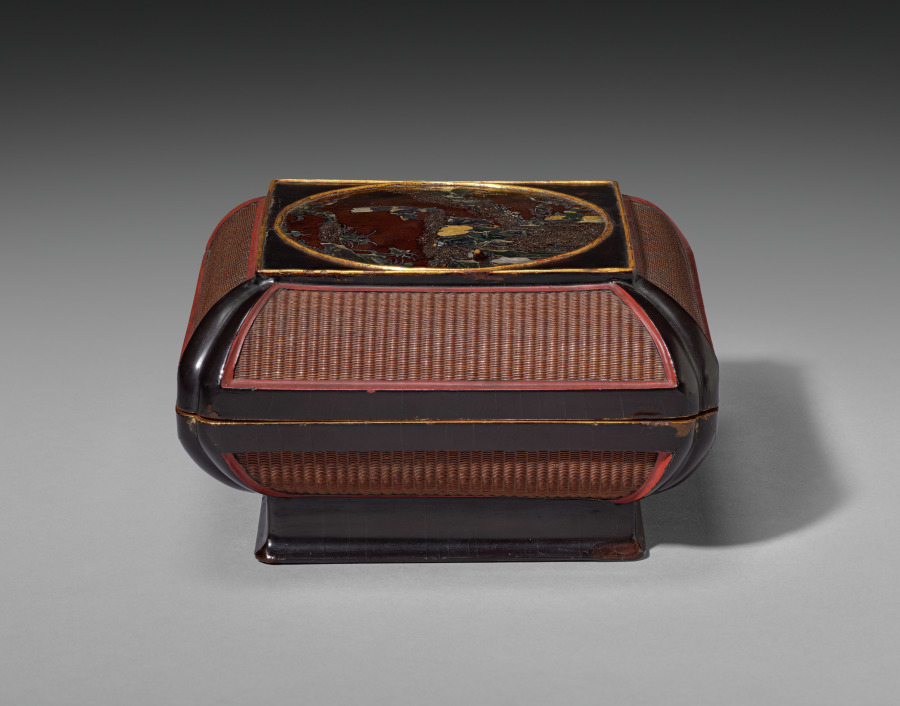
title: Wickerwork Box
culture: China, Ming dynasty (1368-1644), Wanli reign (1572-1620)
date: 1609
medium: lacquered wickerwork (of woven bamboo) framed in wood with circular scene inlaid in mother-of-pearl and gold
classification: Lacquer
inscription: Inscription at bottom in red on black lacquer reads: "commissioned by Yü-Yün-ch'i".